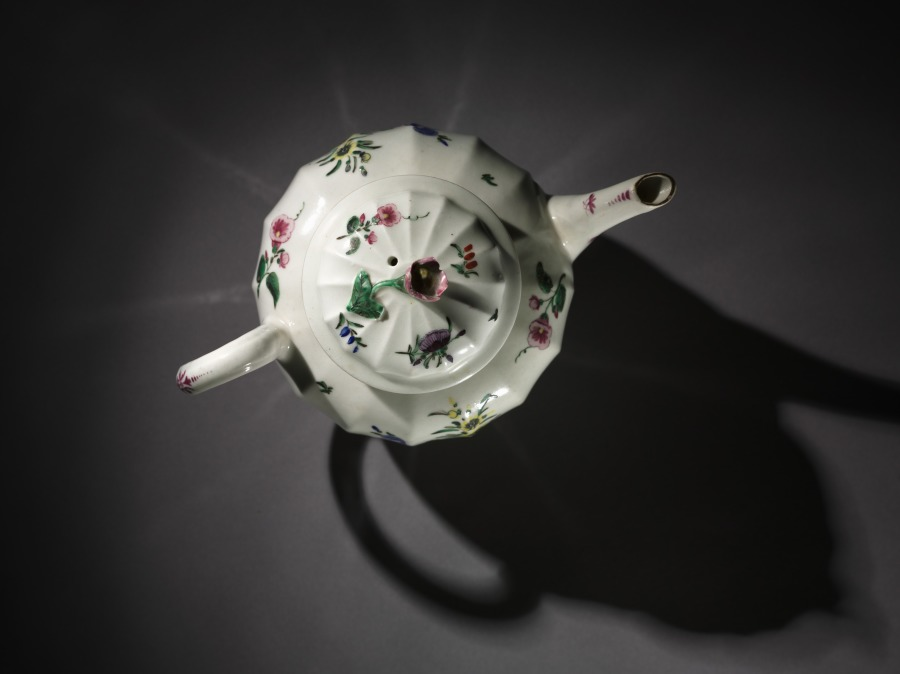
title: Teapot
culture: England, Worcester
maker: Worcester Porcelain Factory (British, established 1751)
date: c. 1755–75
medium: porcelain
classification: Ceramic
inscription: Mark on the bottom - An X with radiating lines inside a box.